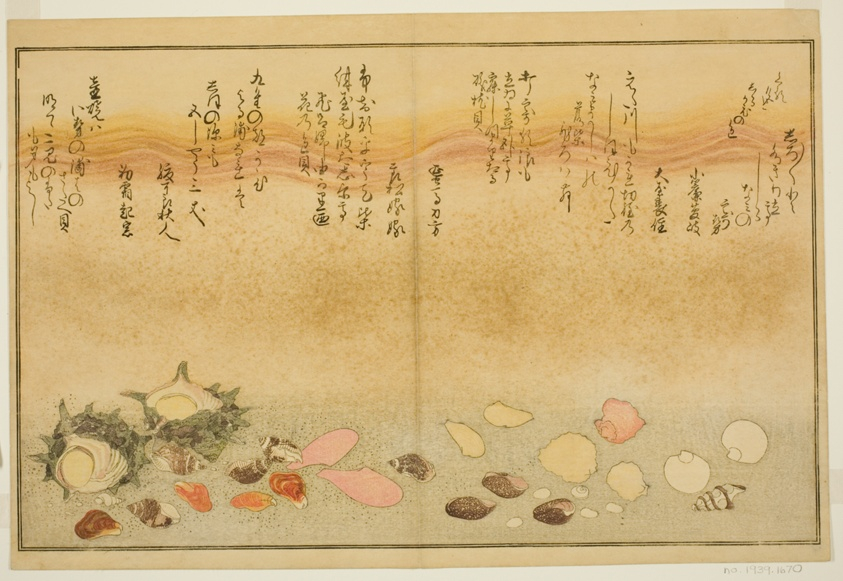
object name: Print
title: Shiro-gai, namima-gashiwa, makura-gai, iro-gai, aza-gai, sadae-gai, from the illustrated book "Gifts from the Ebb Tide (Shiohi no tsuto)"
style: Japanese (culture or style)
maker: Kitagawa Utamaro 喜多川 歌麿; Japanese, 1753 (?)-1806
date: 1789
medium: Color woodblock print; double-page illustration from book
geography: Japan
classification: woodblock print; print; asian art